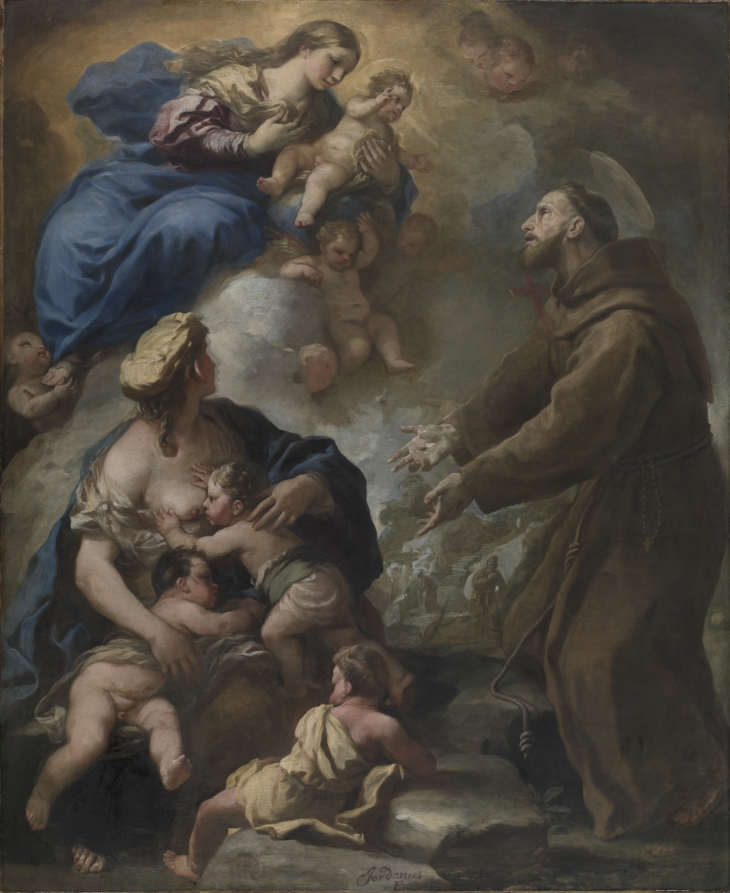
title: The Virgin and Child Appearing to Saint Francis of Assisi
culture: Italy, 17th century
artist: Luca Giordano (Italian, 1634–1705)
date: 1680s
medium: oil on canvas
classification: Painting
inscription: signed lower center: Jordanus F.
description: This work represents the High Baroque tradition of illustrating the visions and ecstasies of holy figures. St. Francis stands to the right of the apparition of the Virgin and Child, while motioning to a mother with three young infants, a symbolic representation of Charity. A popular Italian saint, St. Francis of Assisi (1181?- 1226) was famed for his many holy visions and was reported to have received the stigmata, bodily punctures that echoed the crucifixion wounds of Christ. Close observation of the painting reveals that Giordano originally painted St. Francis motioning his hands towards the Virgin and Child, perhaps reaching for the Infant Christ. In the final version, however, St. Francis gestures to the figure of Charity, as a witness to the saint's spiritual vision. The saint thus serves as the intermediary for humankind, appealing to the Virgin and Child for the sake of Charity. St. Francis, the founder of the Franciscan order of monastics, dedicated his life to assisting the poor and remains one of the most popular Catholic saints.